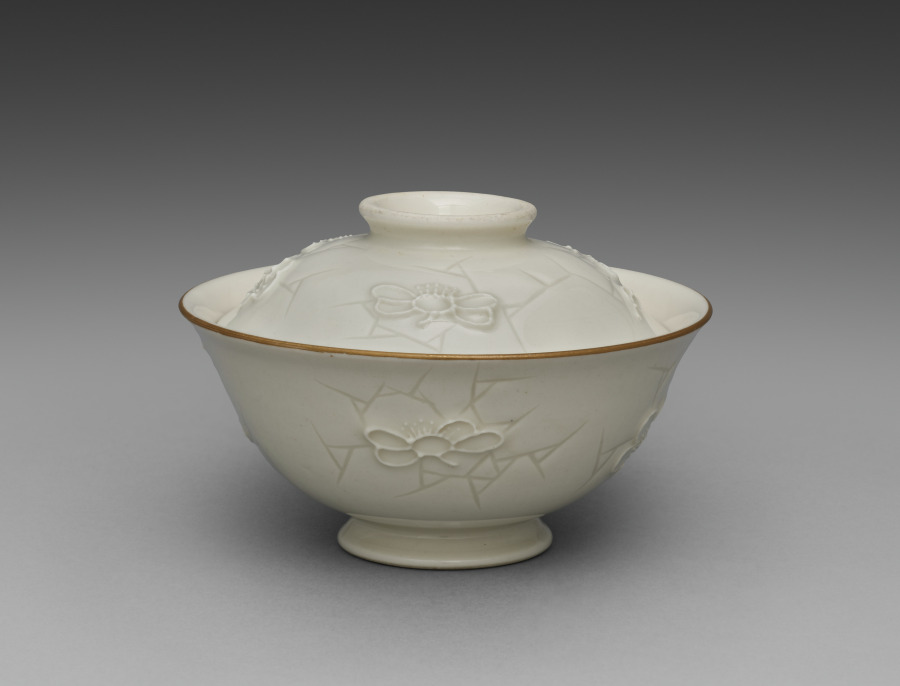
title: Covered Bowl from Dining Set with Plum Blossoms and Cracked-Ice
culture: Japan, Meiji period (1868–1912)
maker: Seifū Yohei II (Japanese, 1844–1878)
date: c. 1875–78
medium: Porcelain with molded designs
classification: Ceramic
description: Each item in this set has a delicate low-relief design of flowering plum branches over scattered, intersecting lines meant to resemble the cracked-ice surface of a frozen body of water and is signed on the base in gold pigment. While Yohei II produced many fine works in underglaze blue, like those produced by Kiyomizu Shichibei, he also made works in quite different styles later in his career, from the early 1870 s. In 1873, he was appointed purveyor to the Industrial Center of Kyoto Prefecture, a designation associated with Kyoto’s efforts to reach an international market through the port of Kobe; and from 1875 until his death, he was involved in national-level projects to present Japanese ceramics across the world. It was during this period that Yohei III was apprenticed to Yohei II, and it has been suggested that this set may in fact be an early example of Yohei III’s work, which he signed with his teacher’s name. Decorated with flowers resembling Japanese textile motifs, the set calls to mind the design of Yohei II’s pair of vases with plum blossoms in the Victoria and Albert Museum. Here, the elaborate trees created for a formal public exhibition setting have been translated into the approachable blossoms of the genteel domestic environment. While the designs are consistent across the pieces, each raised flower petal and pistil and each incised line in the ice was done by hand, so the cups, bowls, and dishes are similar yet unique. The bottoms of two boxes once identified the set’s owner, but the information has been deliberately obscured with black ink. However, inscriptions still visible appear to indicate two occasions, once at the end of July 1886 , and once again in June 1916 , when parts of the set were requested from Hokura in Niigata Prefecture. The location corresponds to a neighborhood in the present-day city of Jōetsu. The surname Tsuji 辻 also appears on a paper tag affixed to one of the box cloths. Future research may possibly reveal more about their provenance. A vase by Yohei III in a private collection combines the formal grandeur of the Yohei II vases in the Victoria and Albert Museum with the gentler design of this dining set, placing flowering plum trees against soft, scalloped-edge clouds resembling those in golden screens.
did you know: The dining wares have a creamy white coloration that the four boxes containing them identify as Korean in style.